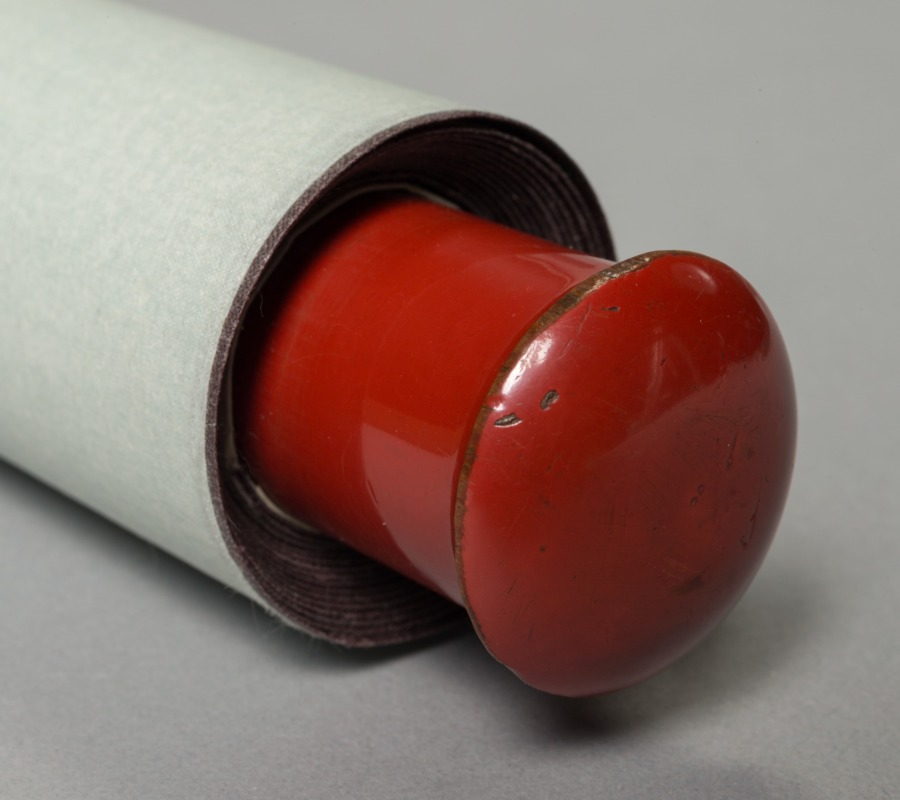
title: A Beauty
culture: Japan, Edo period (1615–1868)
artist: Gion Seitoku (Japanese, active late 1700s–early 1800s)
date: early 1800s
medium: hanging scroll; ink and color on paper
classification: Painting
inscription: 東山画奴井特寫 「字日伯立」白文方印・「せいとく」朱文千鳥印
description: A Kyoto-based ukiyo-e painter, Gion Seitoku specialized in portraying women from Gion and Shimabara, licensed brothel districts in that city. He was known for detailing faces with subtle modeling to heighten a sense of realism. During the 1700s and 1800s, wearing iridescent, greenish lip gloss made from safflower was in vogue. In addition, Japanese women almost universally practiced the custom of artificially blackening their teeth with a stain.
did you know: The person's lipstick is made from safflower.